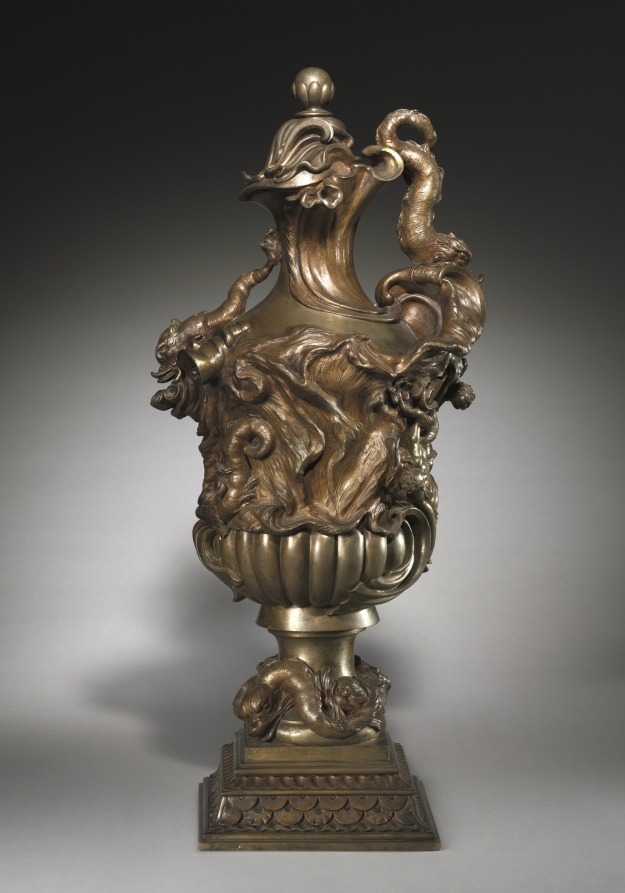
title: Ewer with Triumph of Galatea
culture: Italy, Florence, late 17th-early 18th Century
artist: Massimiliano Soldani (Italian, 1656–1740)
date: c. 1700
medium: bronze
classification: Sculpture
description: Upon discovering the sea nymph Galatea's infidelity, her betrothed, the Cyclops Polyphemus, pulverizes her lover Acis with a rock. In grief, Galatea turns his blood into a river and Acis becomes god of that river, which bears his name. Here Galatea escorts a swarm of sea creatures in celebration of Acis's apotheosis.